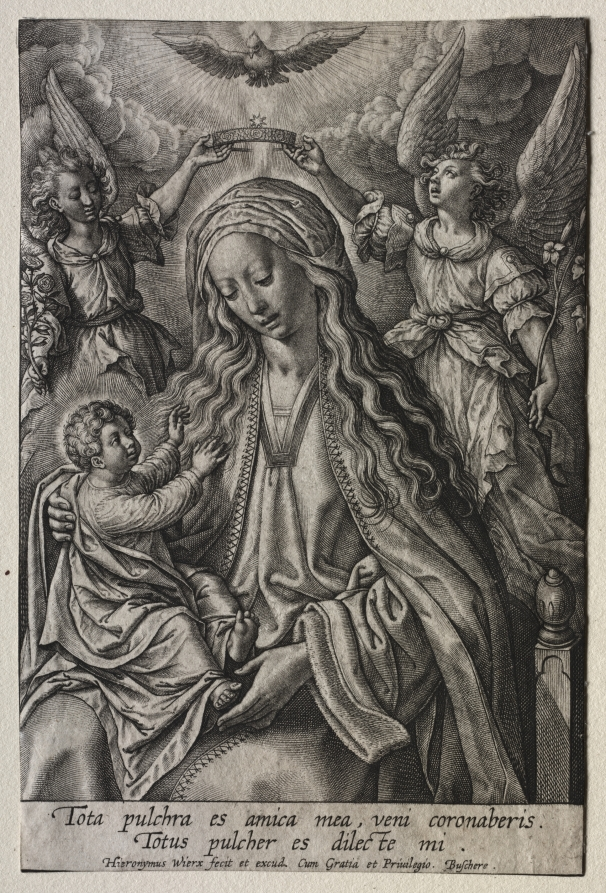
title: Virgin Crowned by Two Angels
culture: Flanders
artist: Hieronymus Wierix (Flemish, 1553–1619)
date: before 1619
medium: engraving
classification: Print